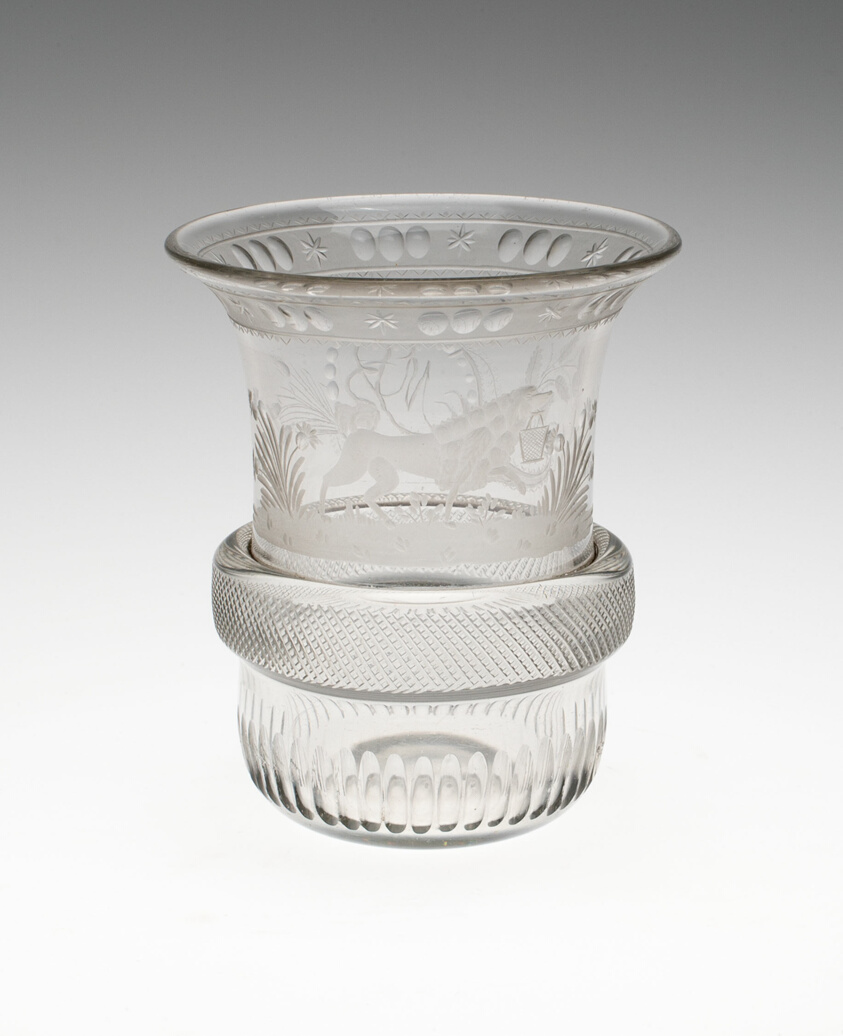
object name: Glass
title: Beaker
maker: Germany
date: c. 1810/20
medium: Glass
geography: Germany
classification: glass; european decorative arts